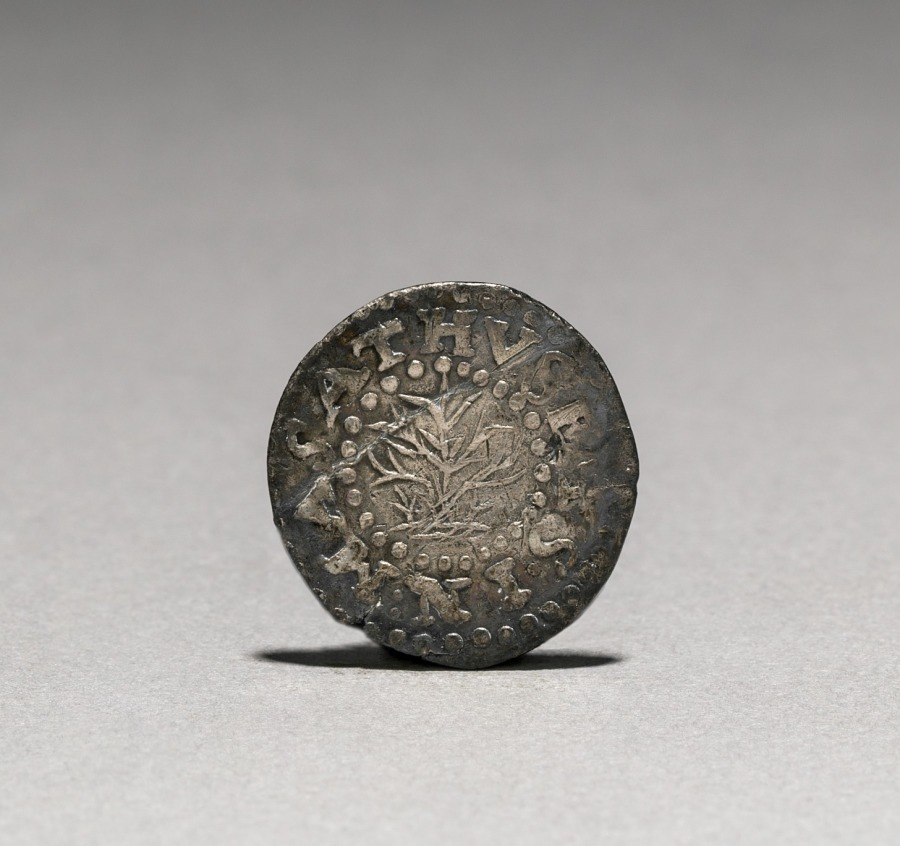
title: Oak Tree Two Pence (obverse)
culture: America, Massachusetts, Boston, 17th century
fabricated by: John Hull (American, 1624–1683)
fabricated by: Robert Sanderson (American, 1609–1693)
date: 1662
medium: silver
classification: Coins